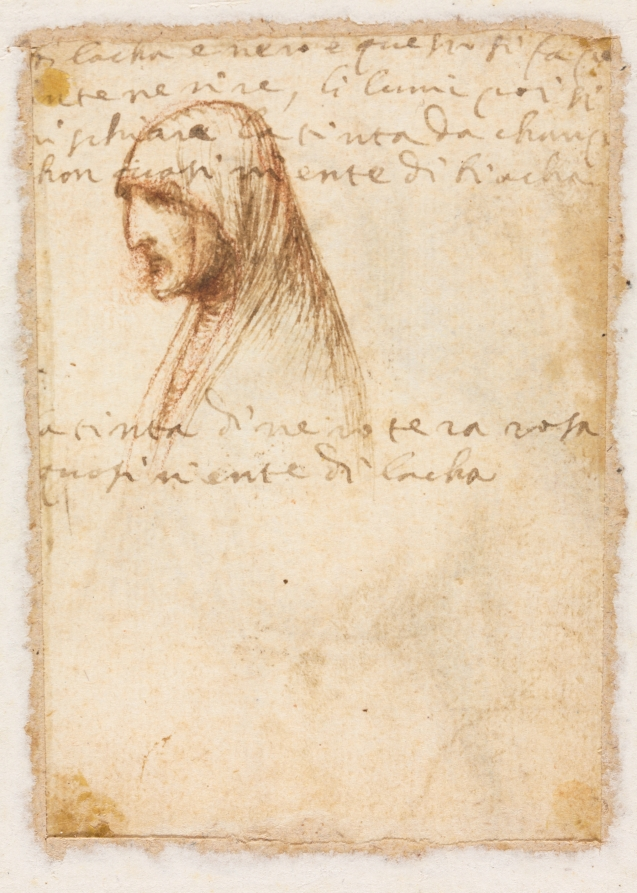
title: Bust-Length Profile of an Old Woman (verso)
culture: Italy, Ferrarese, 16th century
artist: possibly by Dosso Dossi (Italian, c. 1490–after 1541)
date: c. 1521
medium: pen and brown ink with red chalk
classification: Drawing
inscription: across top and center, in brown ink: si lacha e nero e questo si fa [illegible] / inte nerire, ci lumi poi si / rischiara la tinta da cham[illegible] / hon quasi niente di R[a?]ch[i?] / [l?]a tinta di nero [se?]ra rosa / quo[illegible] niente di lacha